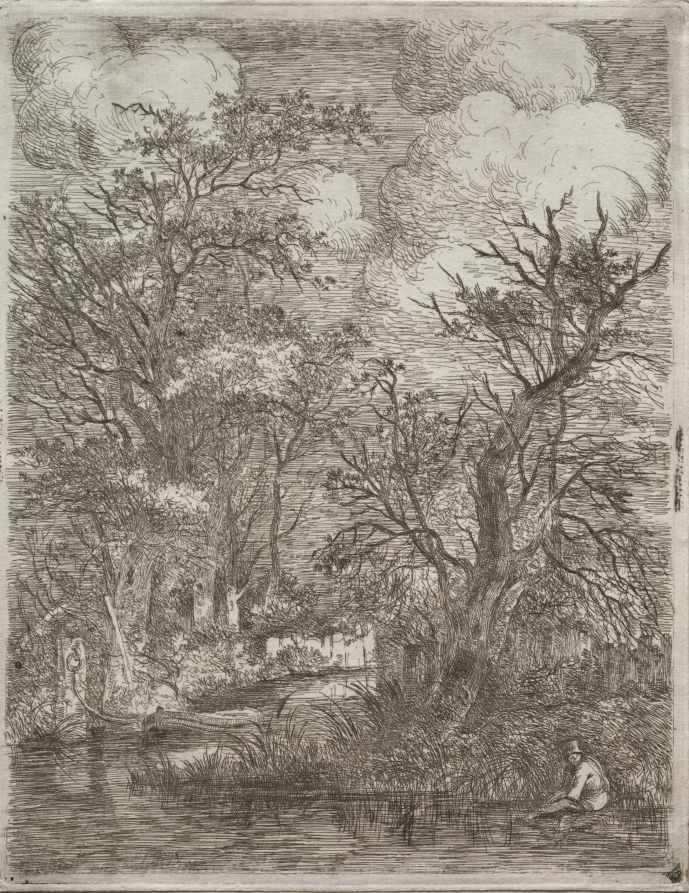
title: Back of the Mills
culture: England, 19th century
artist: John Crome (British, 1768–1821)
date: c. 1812–1813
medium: etching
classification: Print